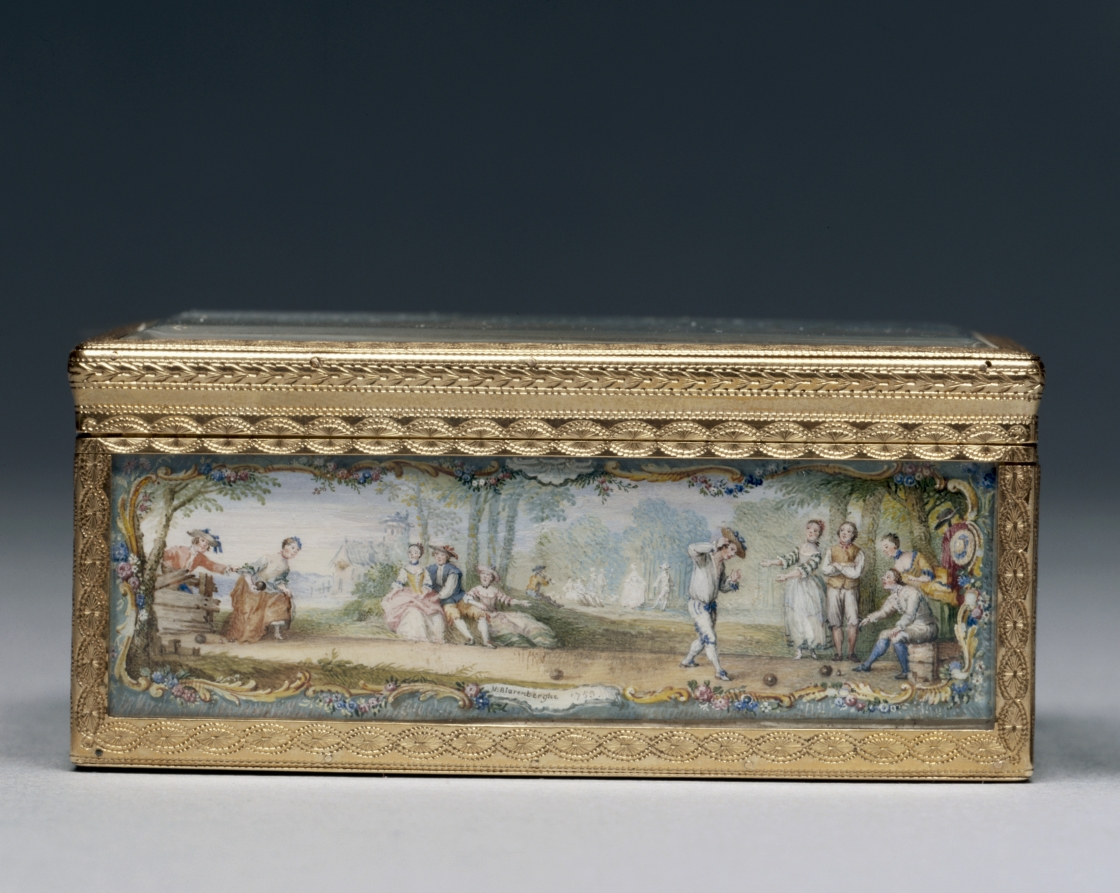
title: Snuff Box (Tabatière)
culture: France, 18th century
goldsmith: Jean Ducrollay (French, 1709–1787)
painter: Louis Nicolas van Blarenberghe (French, 1716–1794)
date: 1753–54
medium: gold and glass with miniatures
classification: Metalwork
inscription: [Maker's mark of Jean Ducrollay, master goldsmith in 1734, inside cover; bottom; right side]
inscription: [Charge mark of Julien Berthe, Paris, 1750-1756, inside cover; bottom; right side]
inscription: [Discharge mark of Julien Berthe, Paris, 1750-1756, on bezel]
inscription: [Inscribed on miniature, front side]: "V.[an] Blarenberghe/1753"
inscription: [Warden's mark for Paris, 1763-1754, inside cover; bottom; right side]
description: In 18th-century France ornately enameled boxes that held snuff—powdered tobacco—became a popular accessory in the French court. This object’s rectangular shape differs from early work attributed to Jean Ducrollay. Though the light colors, floral borders, and depictions of lively outdoor recreation are representative of earlier rococo imagery, the rectangular shape and simple frieze make it a primary example of rising neoclassicism.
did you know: The Ducrollay family was one of the most sought-after Parisian goldsmith workshops under the reign of French King Louis XV.